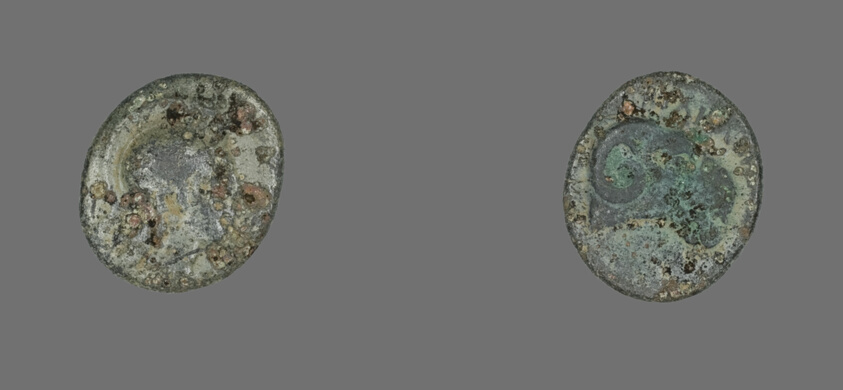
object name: Coin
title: Coin Depicting the Goddess Athena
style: greek, ancient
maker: Greek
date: 387-301 BCE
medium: Bronze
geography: Ancient Greece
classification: coin; ancient art